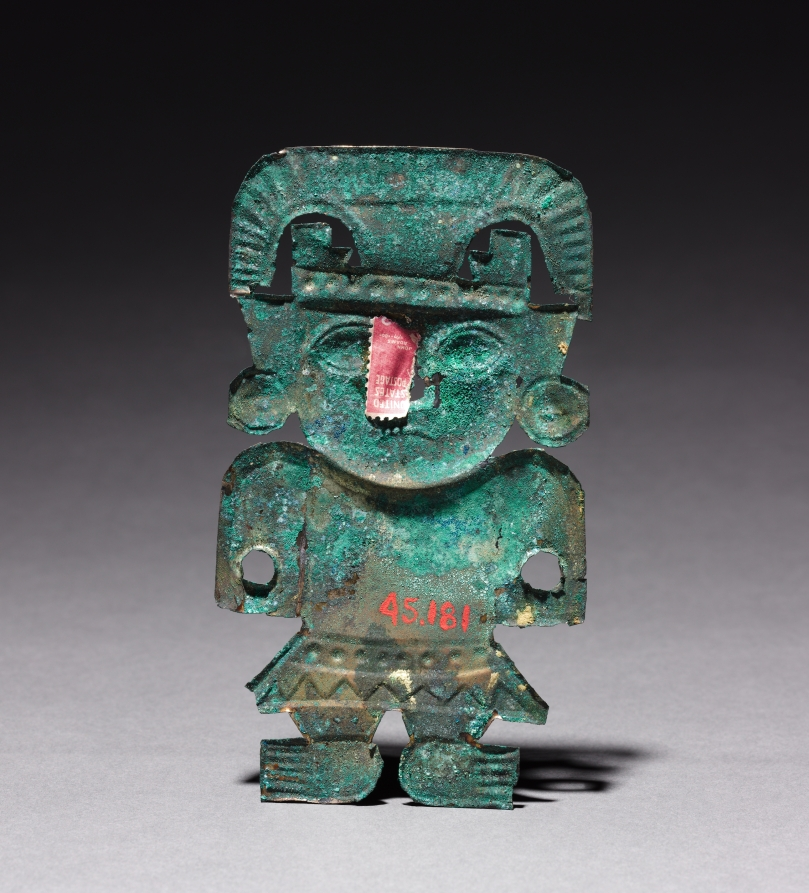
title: Plaque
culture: Peru, North Coast, late Chimú Culture, 14th-15th century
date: 1300s-1400s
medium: bronze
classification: Metalwork